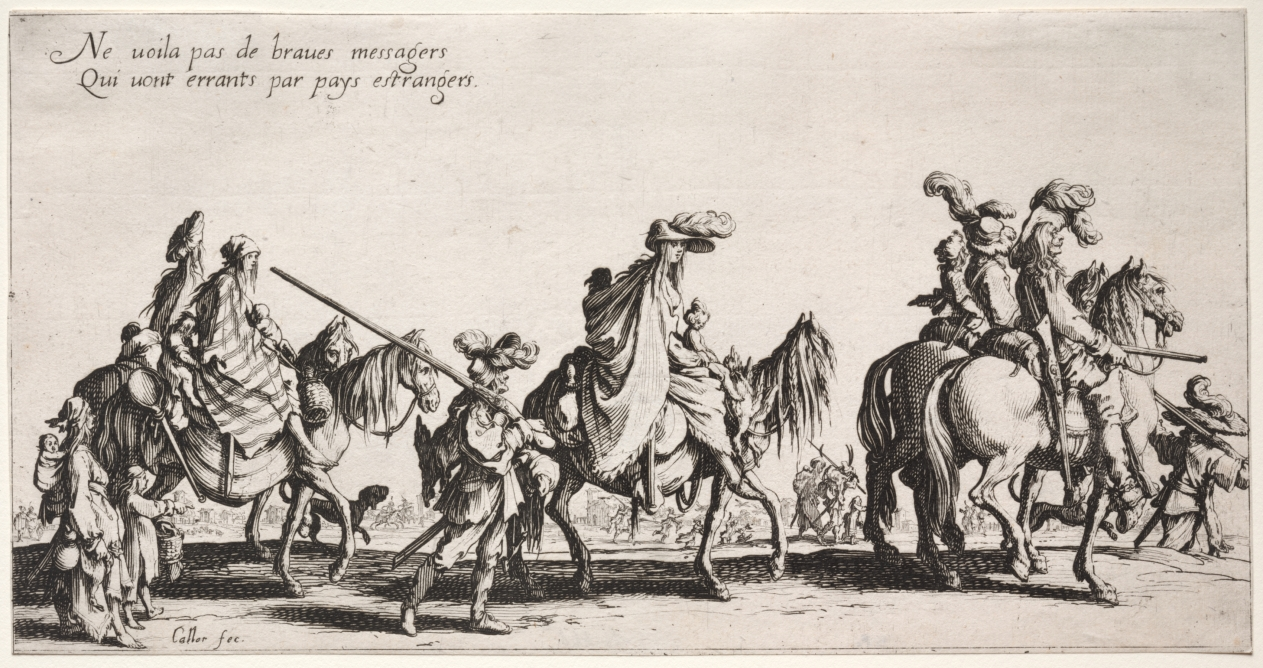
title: The Bohemians: The Bohemians Marching: The Vanguard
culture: France, 17th century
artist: Jacques Callot (French, 1592–1635)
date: c. 1621–1625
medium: etching and engraving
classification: Print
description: Jacques Callot, a masterful draftsman, spent the greater part of his life at the ducal courts of Tuscany and Lorraine, where he produced prints to record festivals and theatrical performances. He also executed religious subjects and scenes reflecting many aspects of daily life including war, pervasive in 17th-century Europe. When returning to France from Italy, Callot probably saw bands of rootless men, women, and children-a common sight-which became the subject of The Bohemians. He conceived of these four prints as a long frieze; the lines in each of the sheets extend into the sheet that follows. The first two scenes depict a procession of scrawny horses and disheveled families in tattered, exotic clothing. The last two show these vagrants pillaging a farm and then enjoying a feast. The inscriptions, from left to right, comment on the action: The only things these poor fortune-telling beggars carry with them are things yet to come. Are these not fine messengers, straying through foreign lands? You who take pleasure in their words, watch out for your blancs, testons and pitolles (coins). When all is said and done, they find that their fate is to have come from Egypt to this feast.